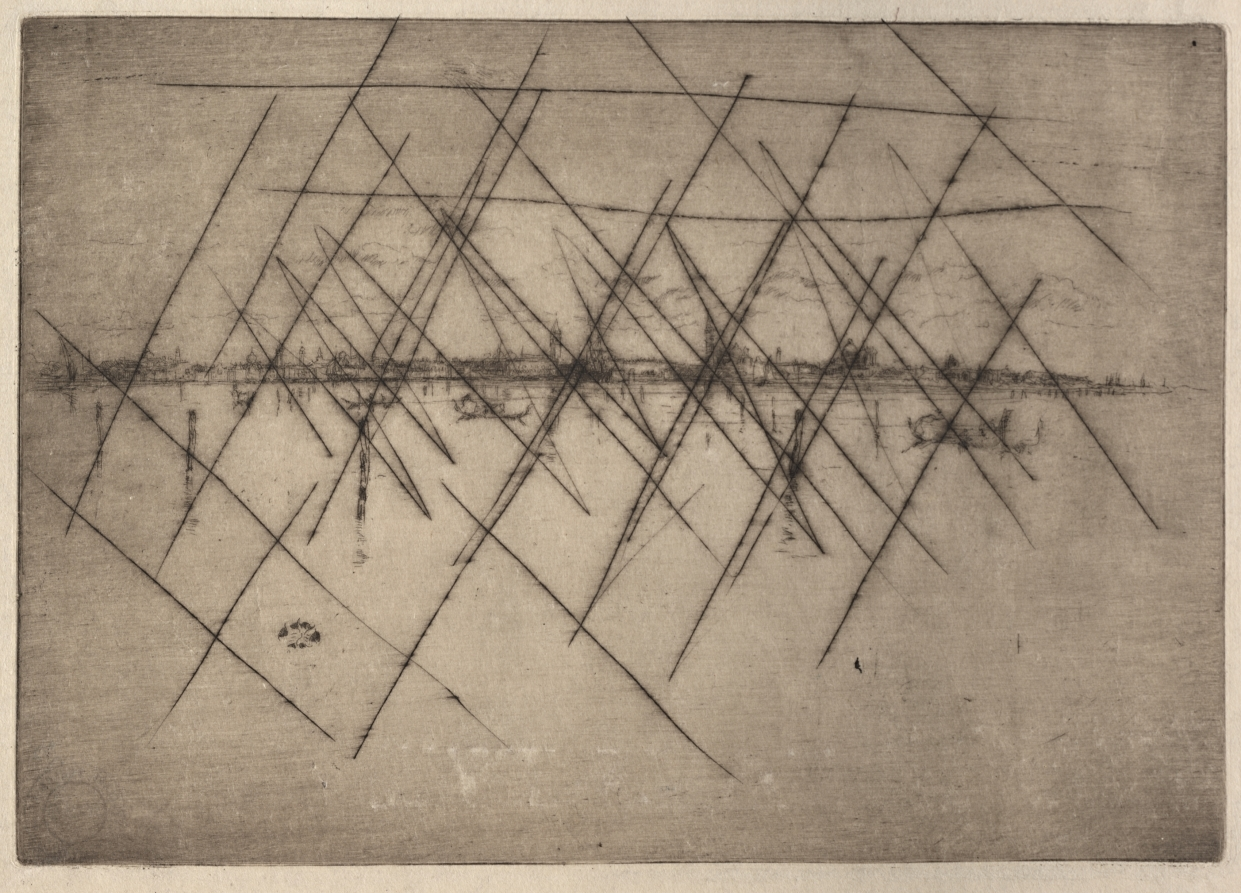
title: Little Venice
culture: America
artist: James McNeill Whistler (American, 1834–1903)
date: 1880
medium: etching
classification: Print